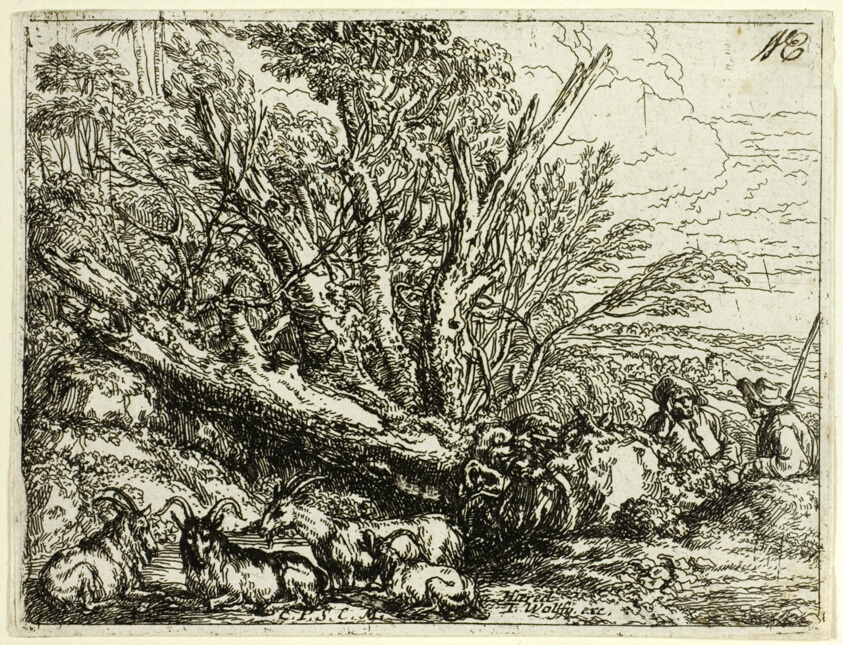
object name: Print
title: Italian Landscape with Ruins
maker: Jonas Umbach the Elder; German, 1624-1693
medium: Etching in black on ivory laid paper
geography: Germany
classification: etching; print; prints and drawing